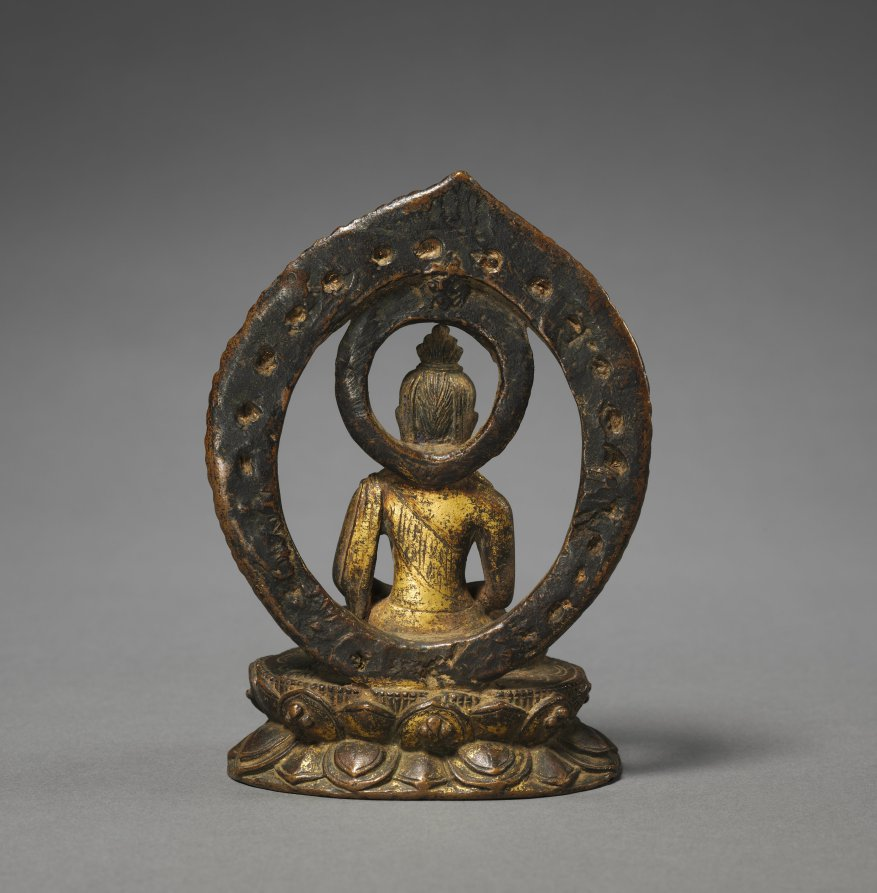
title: Vak, an Emanation of the Buddha Amitabha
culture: Nepal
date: 900s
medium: bronze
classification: Sculpture